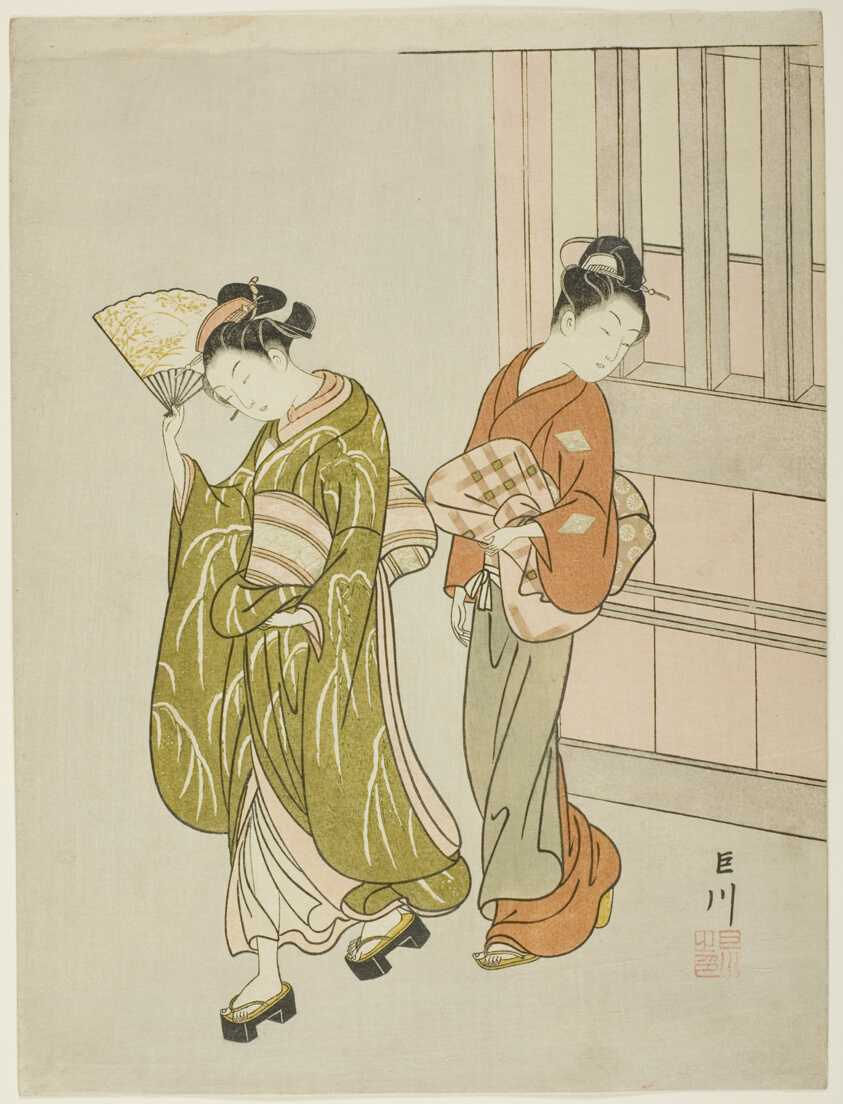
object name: Print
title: Clearing Breeze from a Fan (Ogi no seiran), from the series "Eight Views of the Parlor (Zashiki hakkei)"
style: Japanese (culture or style)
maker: Suzuki Harunobu 鈴木 春信; Japanese, 1725 (?)-1770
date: c. 1766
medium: Color woodblock print; chuban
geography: Japan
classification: woodblock print; print; asian art